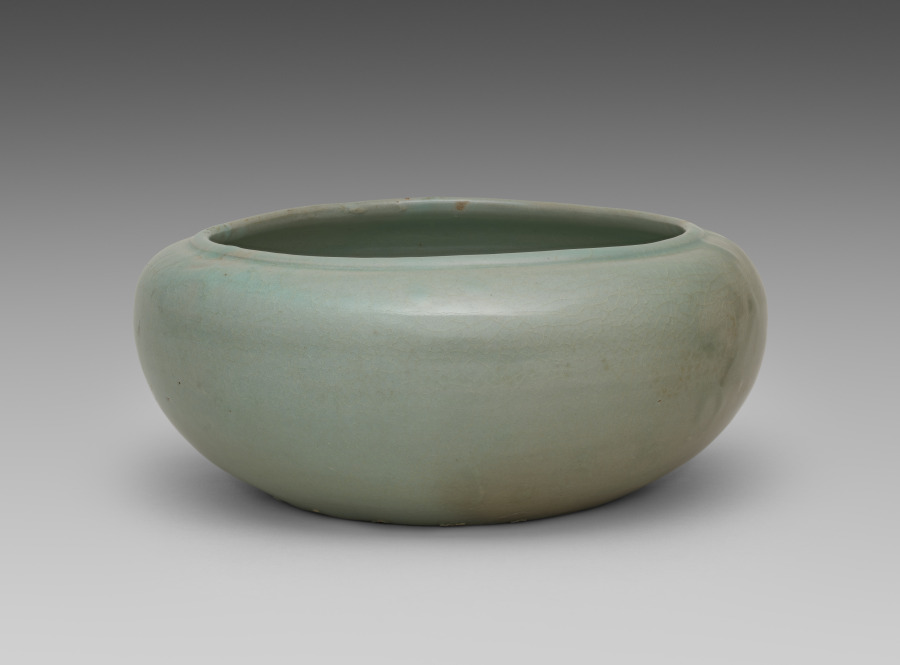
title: Bowl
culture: Korea, Goryeo dynasty (918–1392)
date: 1100s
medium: celadon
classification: Ceramic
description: As early as the seventh century, the practice of drinking tea became an important part of elite culture in Korea. In enjoying teas, elites commissioned a variety of types of utensils and vessels including this large bowl, not only to make their tea-drinking experience more exciting, but also to show their refined taste.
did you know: The distinctive bluish and greenish glaze of Goryeo celadons, shown in this bowl, is the result of distinctive small and long Korean kilns, which maintained a low oxygen saturation with a high level of carbon dioxide.